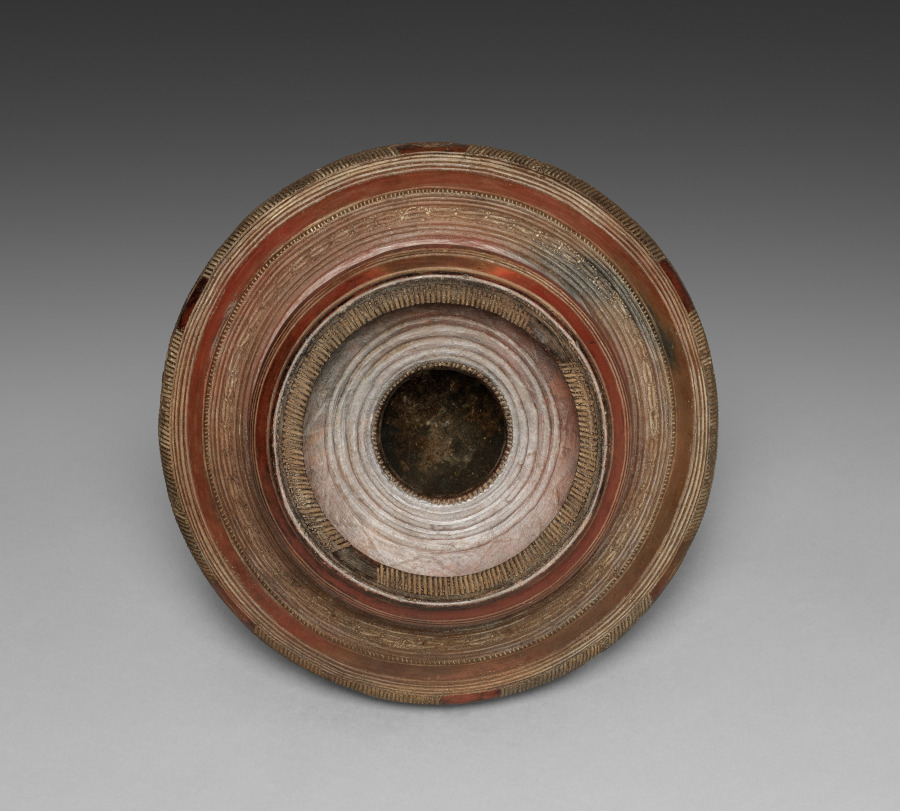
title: Water Transport Jar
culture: Africa, West Africa, Nigeria, Nupe-style pottery, unknown female potter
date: 1900s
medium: Terracotta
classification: Vessels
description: The Nupe, an Islamic people from northern Nigeria, embellish pottery and metalwork with intricate, nonrepresentational patterning. A female potter built this vessel by joining two bowls into a globe shape, then adding the neck. After drying, she used shells to press in designs before burnishing the exterior to a high shine. Finally, she fired the gourd-shaped vessel in a furnace. The patterns beautify and allow a firm grip when lifting the vessel. As the Gwari and Nupe people are neighbors, pottery shapes and designs often transferred between them. Look for similar zigzags and concentric lines on the nearby Gwari-inspired vessels.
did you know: The shape of this vessel probably developed from real gourds used to hold liquids.